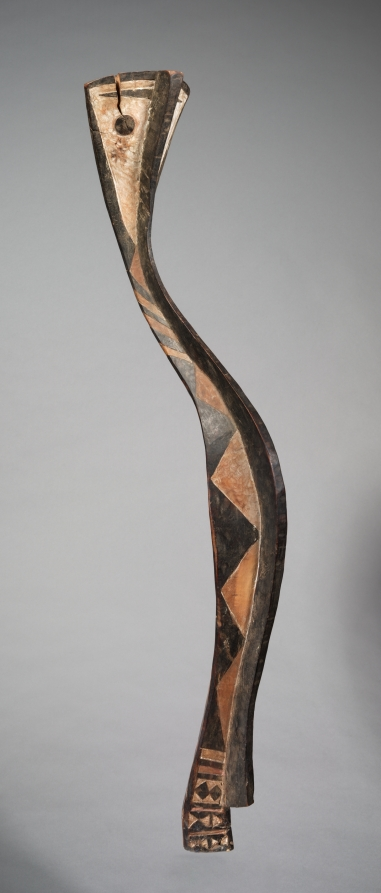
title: Serpent Headdress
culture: Africa, West Africa, Guinea, possibly Baga-style maker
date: late 1800s–early 1900s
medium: Wood (Nauclea pobeguinii) and paint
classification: Mask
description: Traditionally, Baga society was ruled by village councils of elders who derived their power from their direct contact with spirit entities through lifelong initiation rituals and the accumulation of secret knowledge. Two different religious orders controlled initiations, providing the context for much Baga art. One was identified as female, the other as male, though only men belonged to both groups. Initiations in each order followed three stages, culminating in the revelation of the highest spirit being. This type of Baga headdress embodied the serpent spirit Ninkinanka, honored for giving rain, bestowing riches, and bringing forth children. The serpent figure would be placed on top of a conical framework of palm branches carried on a male dancer’s head. It appeared at the end of the first level of the initiation for boys and girls or just before the circumcision at the beginning of the boys’ initiation.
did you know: In the context of boys' initiations, the serpent headdress was sometimes identified as the rainbow, which the Baga and their neighbors associate with beginnings and endings, life and death, and the continuation of lineages.